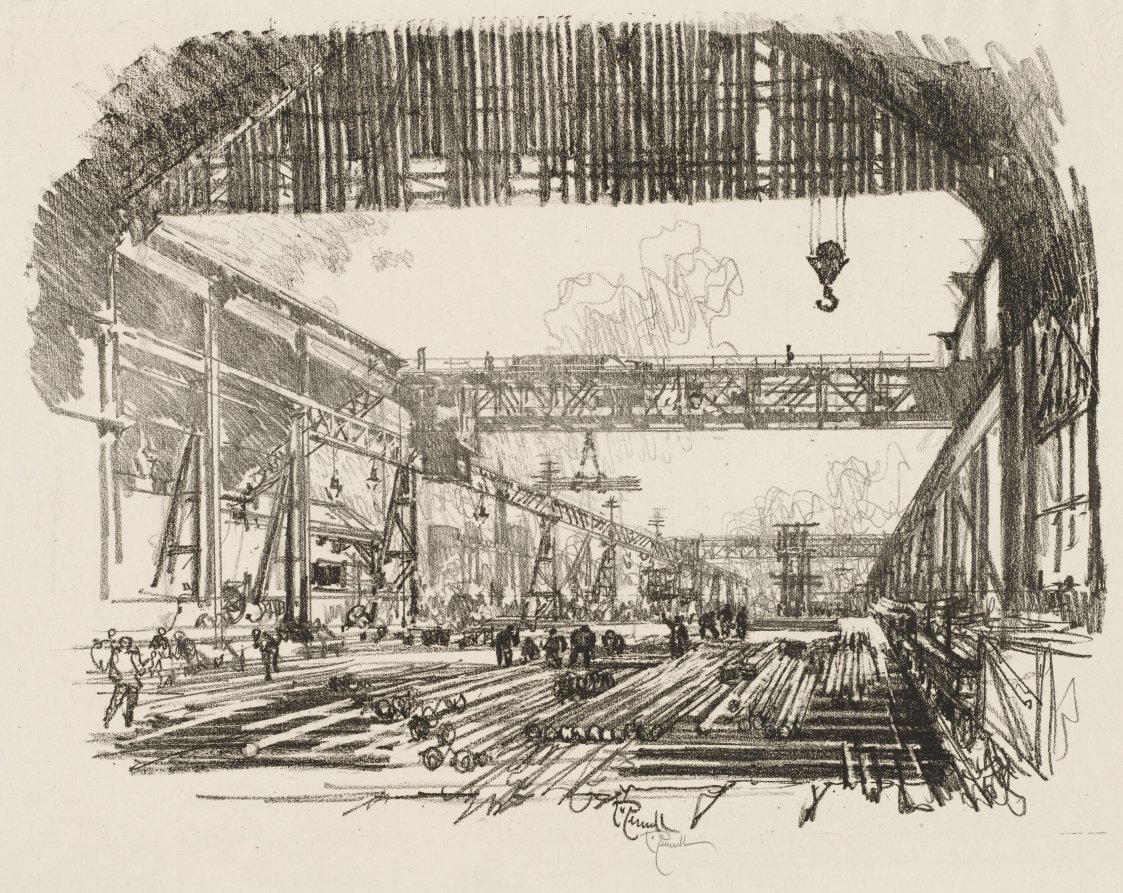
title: English War Work: Steel Bars for Shells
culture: America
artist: Joseph Pennell (American, 1857–1926)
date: 1916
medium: lithograph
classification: Print